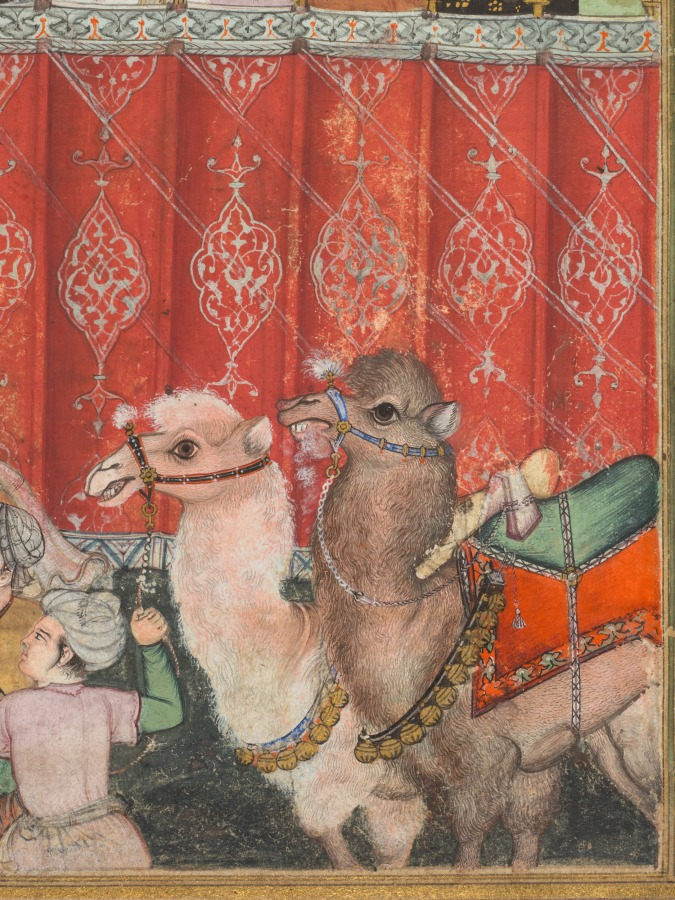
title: A feast for Babur hosted by his half-brother Jahangir Mirza in Ghazni in May 1505, from a Babur-nama (Memoirs of Babur)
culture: India, Mughal, 16th century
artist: Basavana (Indian, active c. 1560–1600)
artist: and Madhav Khurd (Indian, active late 1500s)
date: c. 1589; outer margins added c. mid-1900s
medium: Gum tempera and gold on paper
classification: Painting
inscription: verso: Persian text, in nasta‘liq script: . . . presented many gifts. In that year most of the rivers had become very swollen, to the extent that the Dih-i Ya‘qub River could not be forded. I brought the boat I had made at the lake and floated it in the waters of Dih-i Ya‘qub opposite Kamri and all the people crossed by boat. For this reason we went through the Sajavand pass and straight through crossing the river at Kamri by boat. We arrived at Kabul in the month of Dh’ul-Hijja [May 1505]. A few days earlier, Sayyid Yusuf Beyg had died of colic. At Kush Gunbad, Nasir Mirza had requested leave and remained behind to get provisions for his retinue from his own domain, saying he would follow in two or three days. Once he had left us he sent his entire army to the Nur valley on account of a minor act of disobedience by the people of the Nur valley. [Given] its rice fields and the location of its citadel on the peak of the mountain as . . .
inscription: recto: Persian inscription in bottom margin, in nasta‘liq script: the work of Basavana / [ . . . ] / Madhav Khurd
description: Twenty-one years before his conquest of Delhi, Babur took control of territories in Afghanistan, including the cities of Kabul and Ghazni. His half-brother, who controlled the region around Ghazni, ordered that a party be thrown in honor of Babur’s arrival from the north. Drinking parties and feasts in lavish movable tent settings, where gifts were exchanged, alliances forged, and relationships cemented, were as important to the building of the empire as the battles.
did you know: A manager directs servers to bring spoons and lay out the buffet table.